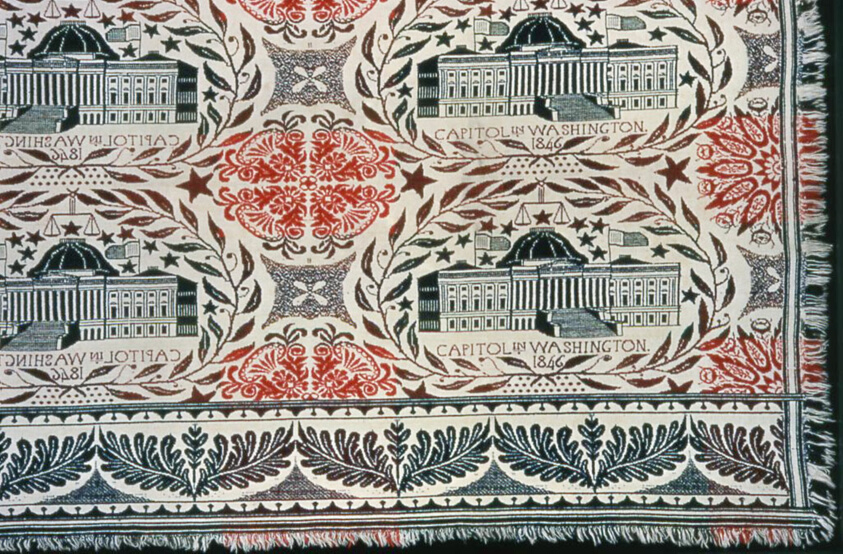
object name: Textile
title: Coverlet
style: 19th century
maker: United States, Ohio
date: 1846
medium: Wool and cotton, plain weave double cloth; main warp and ground weft cut fringe; woven on loom with Jacquard attachment; two loom widths joined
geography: Ohio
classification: weaving - coverlet; coverlet; textile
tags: washington, D.C., buildings, patriotism, medallions, laurel wreaths, foliage, government building, government buildings, coverlet